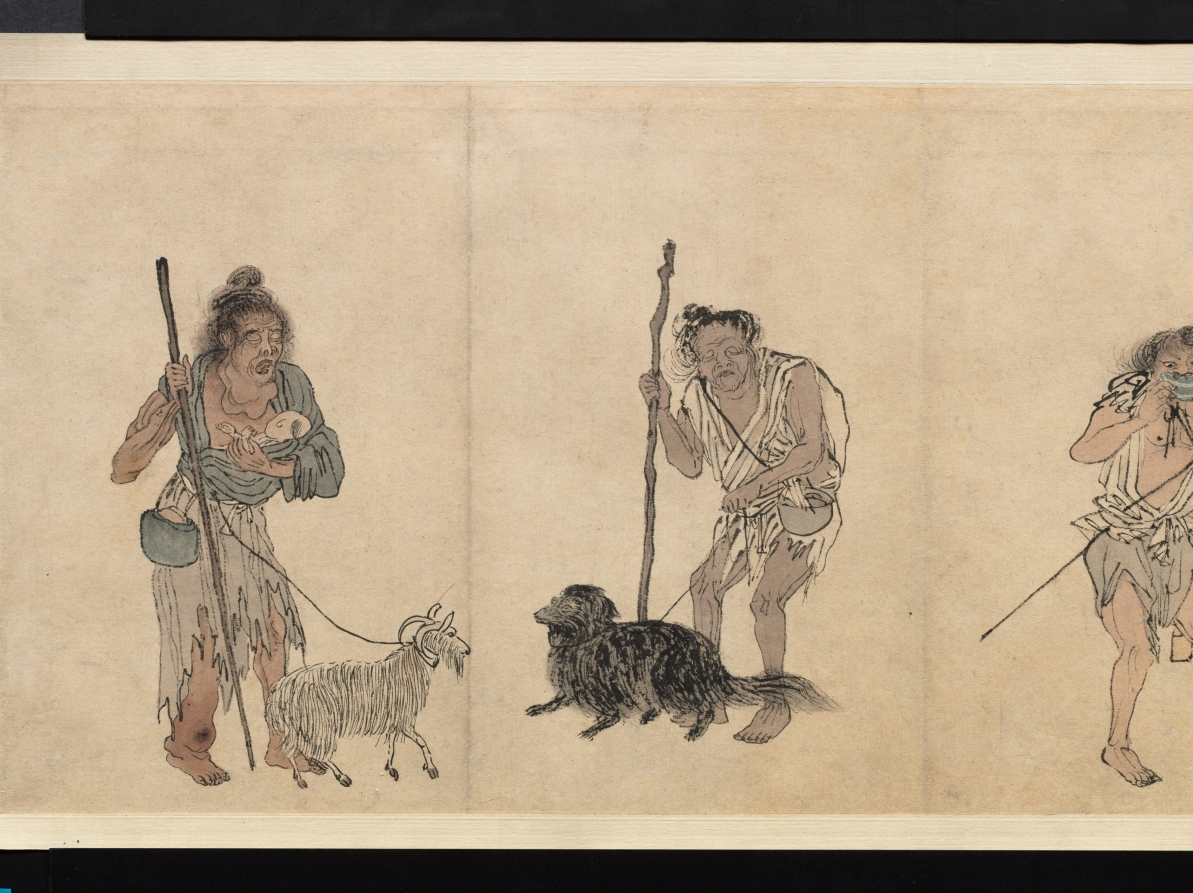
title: Beggars and Street Characters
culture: China, Ming dynasty (1368–1644)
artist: Zhou Chen (Chinese, c. 1450–c. 1536)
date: 1516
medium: Handscroll; ink and light color on paper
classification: Painting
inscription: 題: 周臣流氓圖. 古堇趙鶴琴 [印] 老鶴臨池; 鵝池軒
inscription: 正德丙子秋七月，閒窗無事 ，偶記素見市道丐者種種態度。乘筆硯之便，率爾圖寫。雖無足觀，亦可以助警勵世俗云。 東邨周臣記 [印]東邨; 舜卿; 鵝場散人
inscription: 吳中東邨周君，善丹青，尤長於人物。此圖其所見盛市丐者之狀種種，各盡其態，觀者絕倒。嗟乎，今之晝夜乞哀以求富貴者，安得起周君而貌之耶。臥雲徵君出示，余漫題其後。 甲子歲十月吳門黃姬水 [印] 士雅山人; 另一印不詳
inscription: 是冊凡數種。其飢寒流離疲癃殘疾之狀，種種之異。觀此而不惻然心傷者，非仁人也。計正德丙子逆瑾之流毒已數年。而[江]彬 [錢] 寧輩肆虐方熾。意分符剖竹諸君，亦鮮有能撫字其民者。然則舜卿此作，殆與鄭君 流民圖同意。其有補於治道者不淺，要不可以墨戲忽之也。 長洲張風翼題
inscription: 東村此筆，蓋圖寫飢寒乞丐之態，以警世俗耳。而質山 [黃姬水]欲其寫昏夜乞哀，而靈墟[張鳳翼]則擬之於安上門圖。二君之見，其各有所指哉。昔唐六如每見周筆，輒稱曰：周先生！蓋深服其神妙之不可及。若此冊者，信非他人可能而有符於六如之心伏矣。豈易得耶。若黃、張之指，則又論於畫之外，不在於形似筆墨之旨也。 萬歷丁丑十二月三日 茂苑文嘉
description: Zhou Chen from Suzhou provides rare depictions of impoverished people that once filled the city’s markets and streets. Despite Suzhou’s prosperity, its rapid growth polarized society, including the wealthy and those who had deserted their farmlands, who were without homes, unemployed, or sick. Amid these are figures who inspire fear rather than empathy. The painting may thus be informed by local practices at the end of the lunar year, in which street beggars, in exchange for food or money, would dress up like ghosts and demons to drive out evil forces.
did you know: Although Zhou Chen's original composition was an album of 24 figures, today it is mounted as two handscrolls, one in the Cleveland collection and one in the Honolulu Museum of Art.